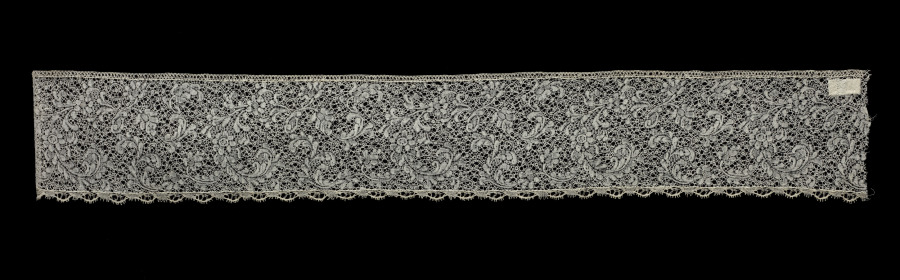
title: Lace Edging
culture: Belgium, Binche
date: 1700s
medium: Linen: bobbin lace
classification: Lace